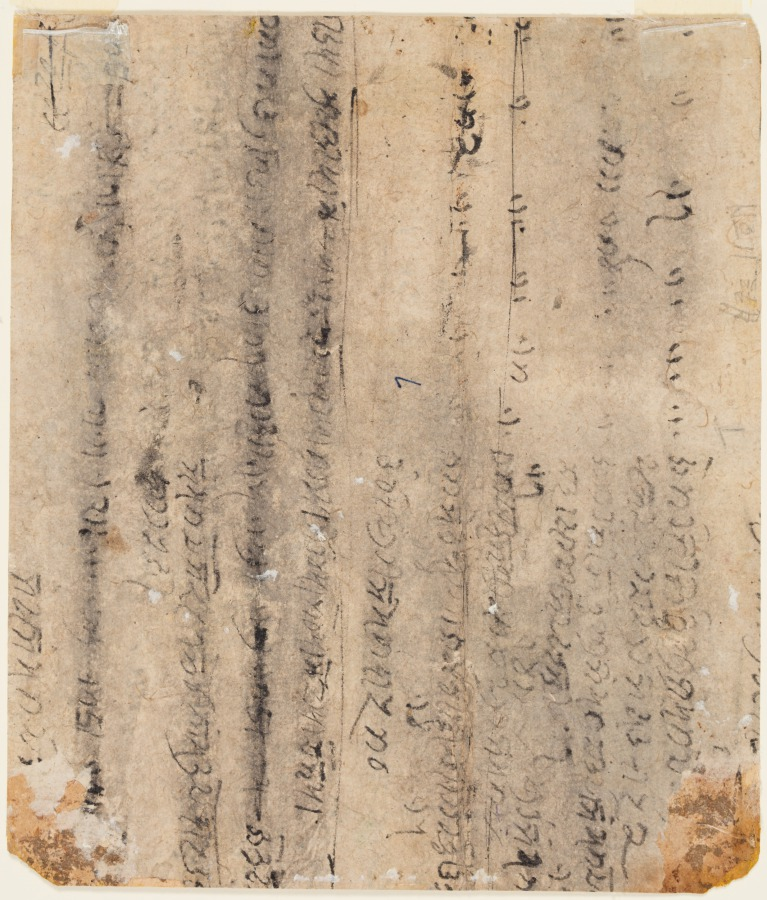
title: A couple in their chamber in early morning: Vighada Ragaputra of Shri Raga, from a Ragamala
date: c. 1700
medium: gum tempera and gold on paper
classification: Painting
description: A couple sits on a striped carpet (durri) inside a brightly lit chamber. The man stretches his arms, apparently having just awoken, while the woman kneels before him in a gesture of address. Architectural details on the second floor include niches for bottles and red curtains rolled up to allow a breeze to pass through colorful bamboo screens.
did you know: Vigadh is also known as vihaga, a word for “morning” in Pahari languages.